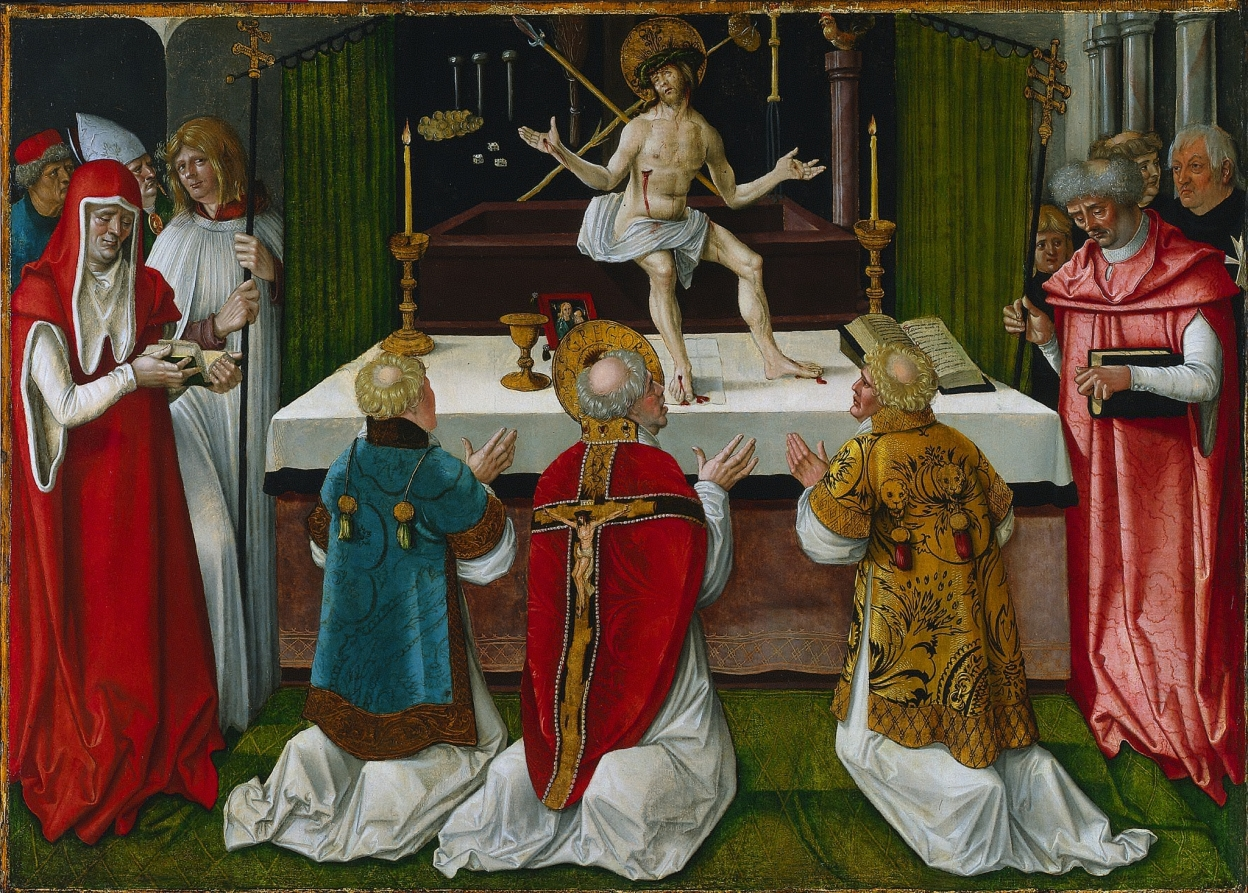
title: The Mass of Saint Gregory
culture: Germany, Strassburg, 16th century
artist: Hans Baldung (German, 1484/85–1545)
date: 1511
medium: oil and tempera on wood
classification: Painting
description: Saint Gregory was a late 6th-century pope and one of the fathers of the early Roman Church. This painting depicts the popular legend in which Gregory once overheard an onlooker express doubts about Christ’s actual presence at the altar during mass. In response, the saint’s immense faith was rewarded by a vision of Christ surrounded by the instruments and symbols of his passion. Saint Gregory, vested in his chasuble, kneels in the center, flanked by priests who share his amazement. This painting was part of an altarpiece commissioned by Erhard Künig, a member of a charitable lay order for a monastery near Strassburg. Künig stands at the far right wearing a Maltese cross. The two wings of the altar, showing respectively Saint John the Evangelist and Saint John the Baptist, are in New York and Washington. Hans Baldung was both a painter and a printmaker and is regarded as one of the most gifted students of Albrecht Dürer.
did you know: Saint Gregory was a 6th-century pope and one of the fathers of the early Roman church. The artist, Hans Baldung, chose to depict the historical legend of Gregory's vision in a scene reminiscent of his own time period, 900 years after this pope actually lived.